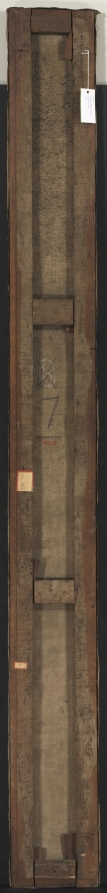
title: Decorative Panel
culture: France, 18th century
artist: Pierre Rousseau (French, 1751–1829)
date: 1790s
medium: oil on canvas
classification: Painting